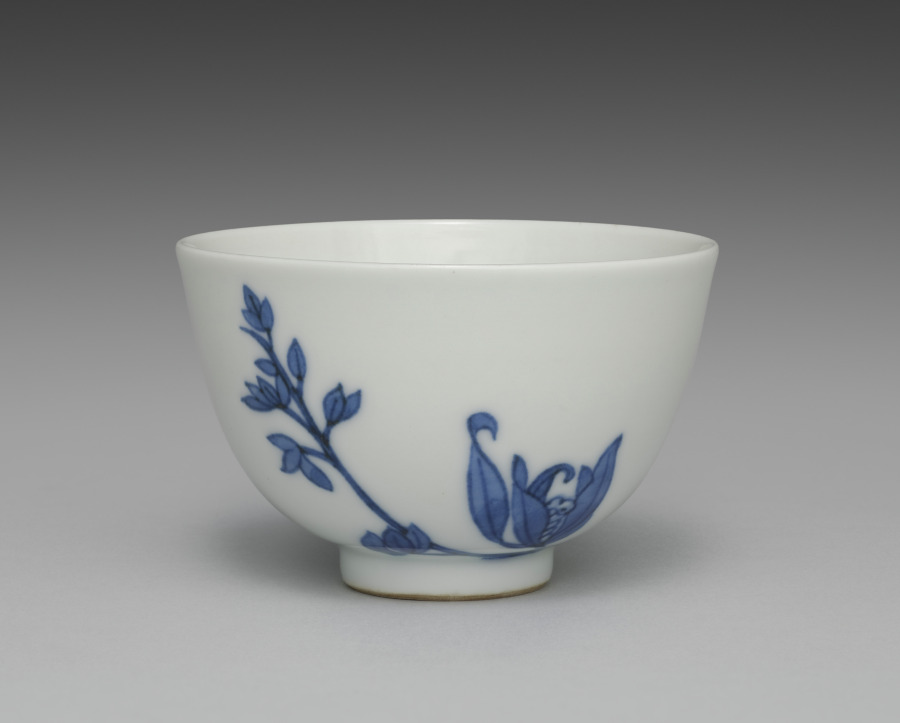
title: Teacup from Tea Set with Orchids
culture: Japan, Meiji period (1868–1912)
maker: Seifū Yohei III (Japanese, 1851–1914)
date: c. 1893–1914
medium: Porcelain with underglaze blue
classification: Ceramic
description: Although the teapot here is stored in a separate box from the five cups, these six pieces may once have been part of a tea set that included other tools such as a water cooler. The teacups have orchid flowers on both sides in underglaze blue, as well as a blue band inside the footring. The teapot has the same design and a blue band painted around the bottom of the lid’s knob. The cups’ long wood storage box is stamped on the exterior, over the lid and base, with a small red seal reading “Satō.” The same seal appears on five small squares of yellow textile, one placed in the bottom of each compartment in the teacup storage box. These are additional to the customary yellow cloths stamped with a “Seifu” seal. Interestingly, four of the Seifū cloths are stamped with an ovoid seal, while the remaining cloth, which is a slightly lighter color, has an unusual seal that is not quite gourd-shaped and with the fū of Seifū in a stylized, unrecognizable form. The teapot has its own box with a Satō seal and is wrapped with an orange textile stamped with the same unusual Seifū seal. A set with a very similar surface design is in the Brooklyn Museum. The Brooklyn set has a water cooler and a small pitcher, in addition to the teapot and cups, and all are in a single storage box. This box records the tea tools as made with kanpakuji, or “bright-jewel white porcelain,” counted among Yohei III’s most important inventions, and carved images. In fact, both sets have a white surface much closer in coloration to the cool white of porcelain clay used in Kyoto at the time, and the designs are simply painted. The Brooklyn set was thus likely mismatched at some point with a box intended for another tea set. Nonetheless, the box may have helped prevent the set’s original components from being dispersed, and the set itself provides insight into how the other tools from the present set may have looked.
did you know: This tea set with orchids has a side-handled pot called a kyūsu, used for steeping, straining, and serving tea.